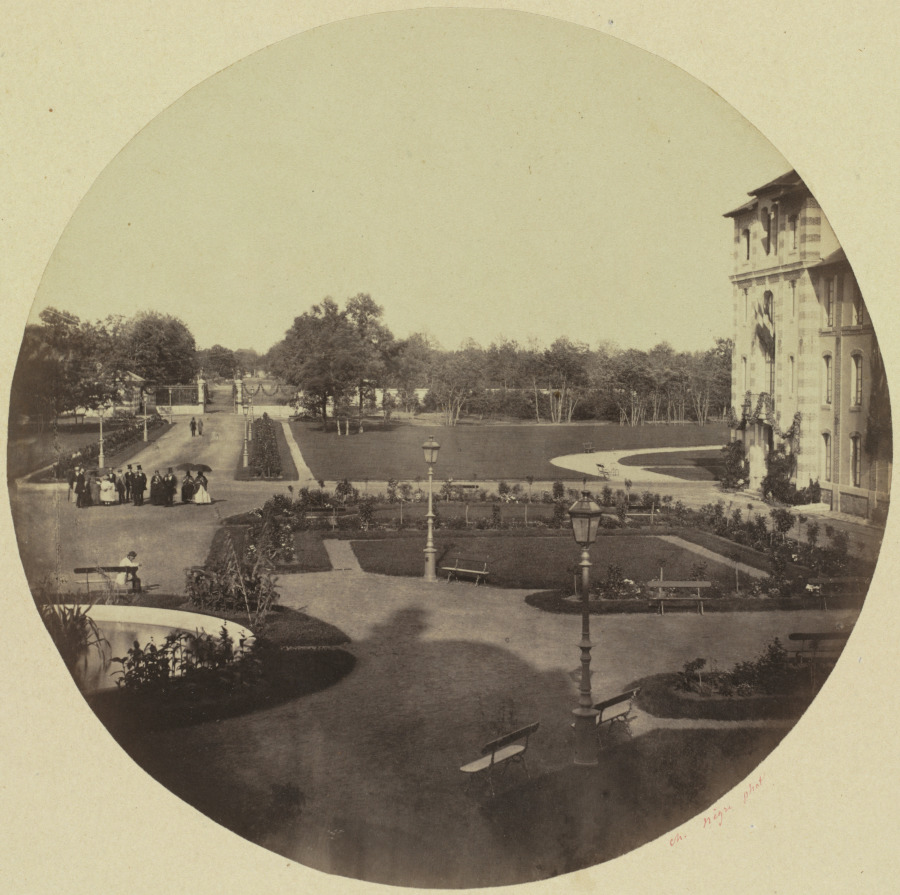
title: The Asylum at Vincennes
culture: France, 19th century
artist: Charles Nègre (French, 1820–1880)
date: c. 1859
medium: albumen print from wet collodion negative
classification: Photograph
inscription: written in pencil on verso: "38 [circled]" written on first mount in red ink: "Ch. Nègre phot"